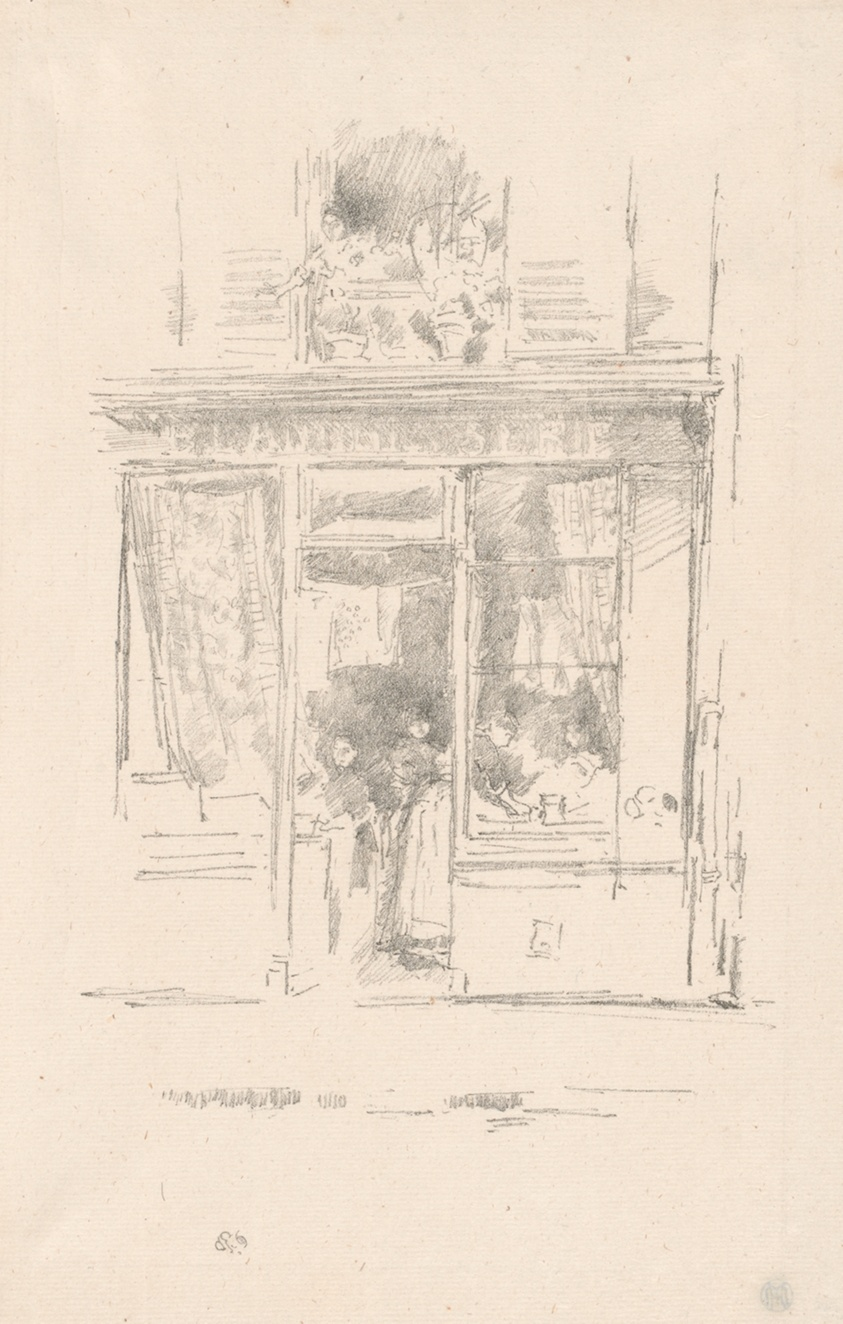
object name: Print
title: The Laundress: "La Blanchisseuse de la Place Dauphine"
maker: James McNeill Whistler (American, 1834-1903)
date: 1894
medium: Transfer lithograph in black on ivory laid paper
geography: United States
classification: transfer lithograph; lithograph; print; prints and drawing; paper